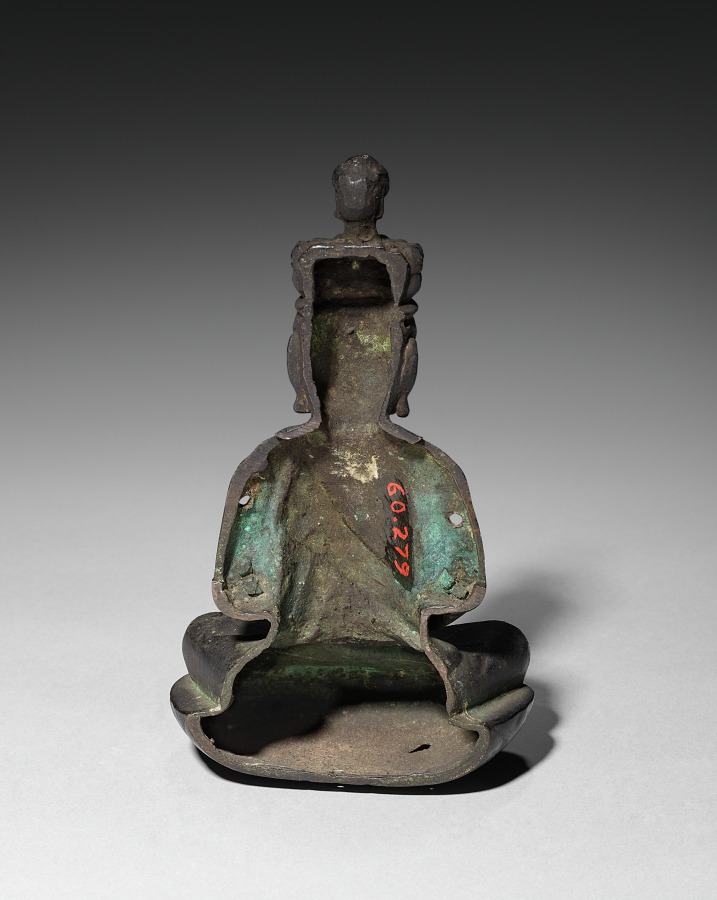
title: Eleven-Headed Kannon (Jūichimen Kannon)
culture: Japan, Heian period (794–1185) to Kamakura period (1185–1333)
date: 1100s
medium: bronze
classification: Sculpture